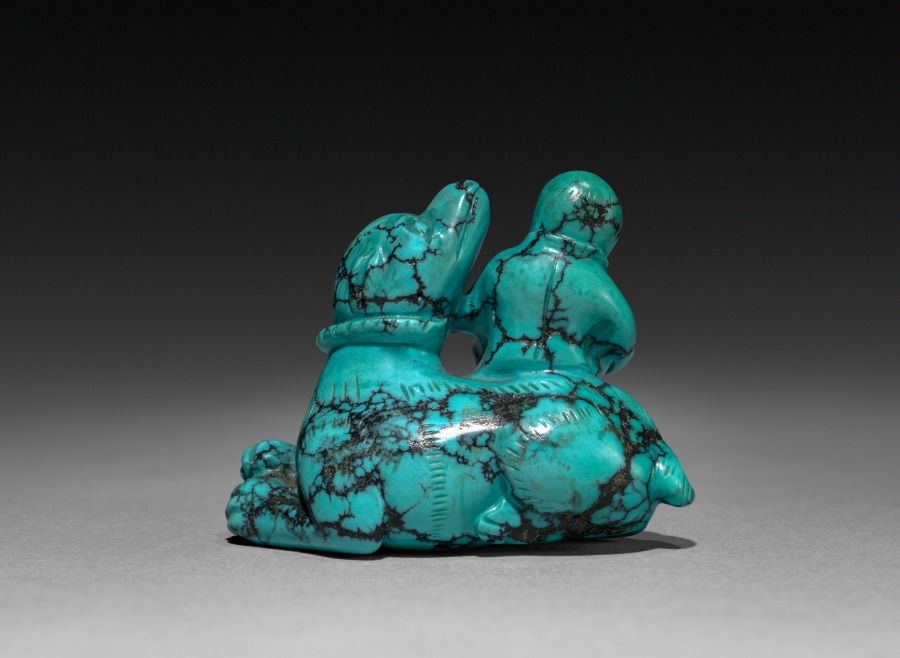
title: Boy and Dog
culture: China, Ming dynasty (1368–1644)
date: 1400s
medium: Turquoise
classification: Stone